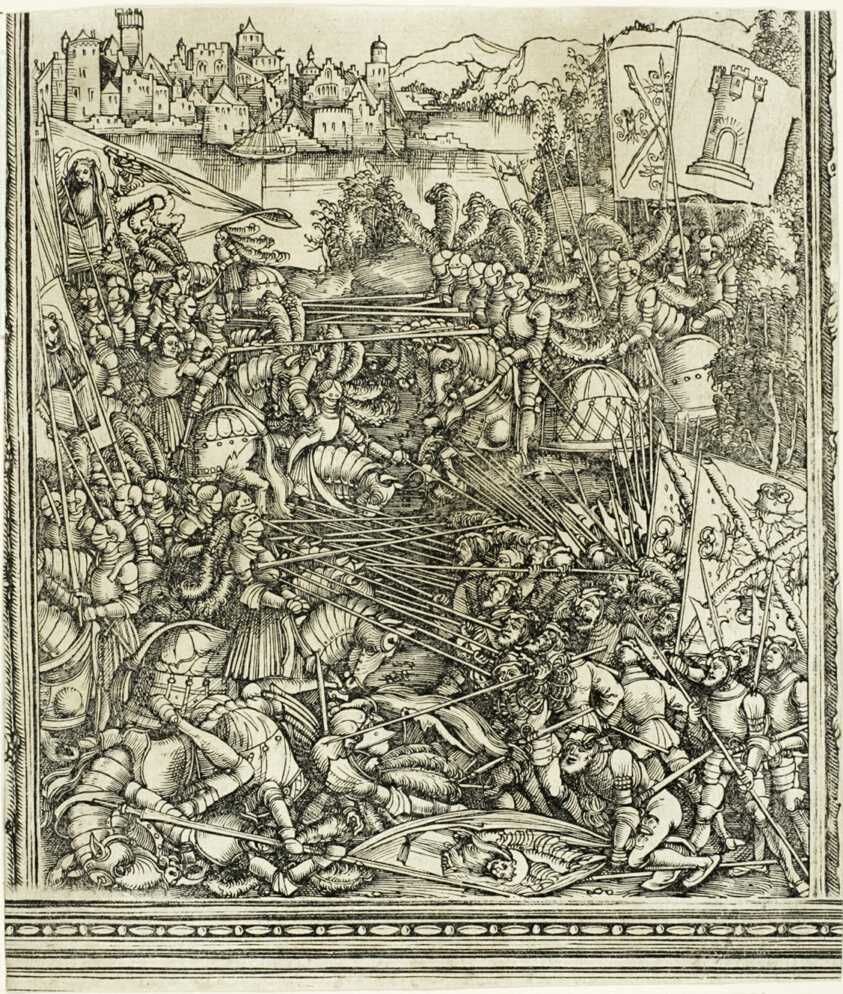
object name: Print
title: The War with Venice, from The Triumphal Arch of Maximilian I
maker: School of Albrecht Dürer (German, 1471-1528); probably Hans Springinklee (German, c. 1495-1522); possibly Wolf Traut (German, c. 1480-1520); printed by Hieronymus Andreae (German, died 1556)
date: 1515–17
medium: Woodcut in black on ivory laid paper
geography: Germany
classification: woodcut; print; prints and drawing; paper